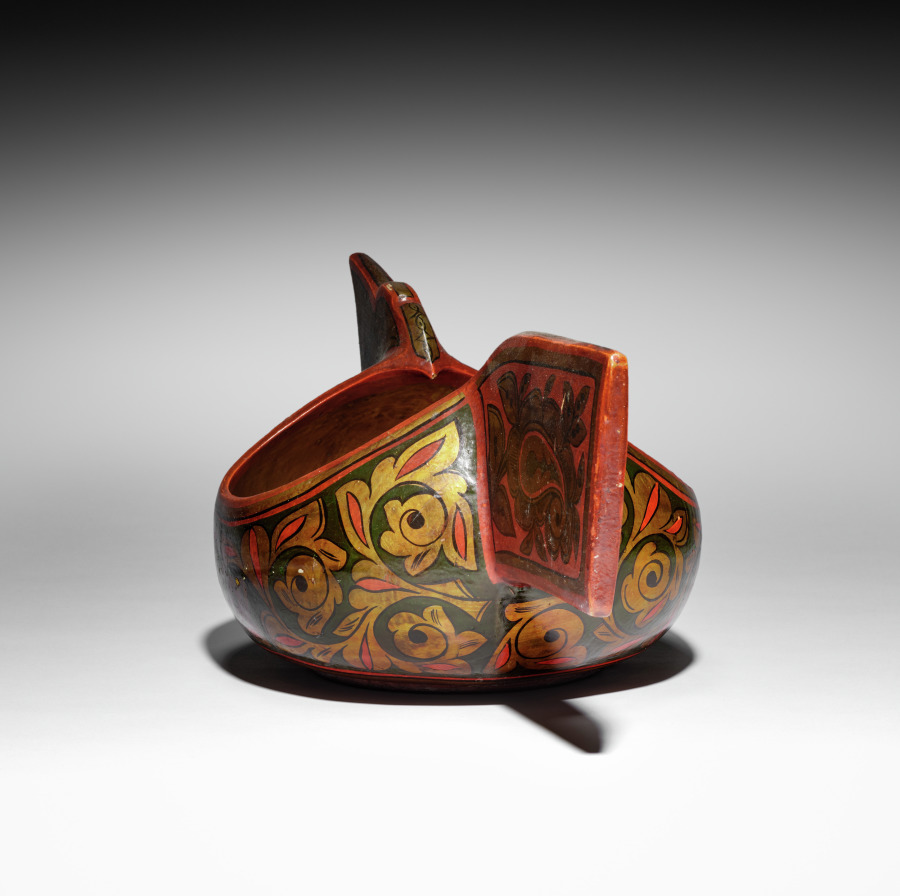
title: Wedding Cup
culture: Russia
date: before 1949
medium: lacquer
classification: Lacquer